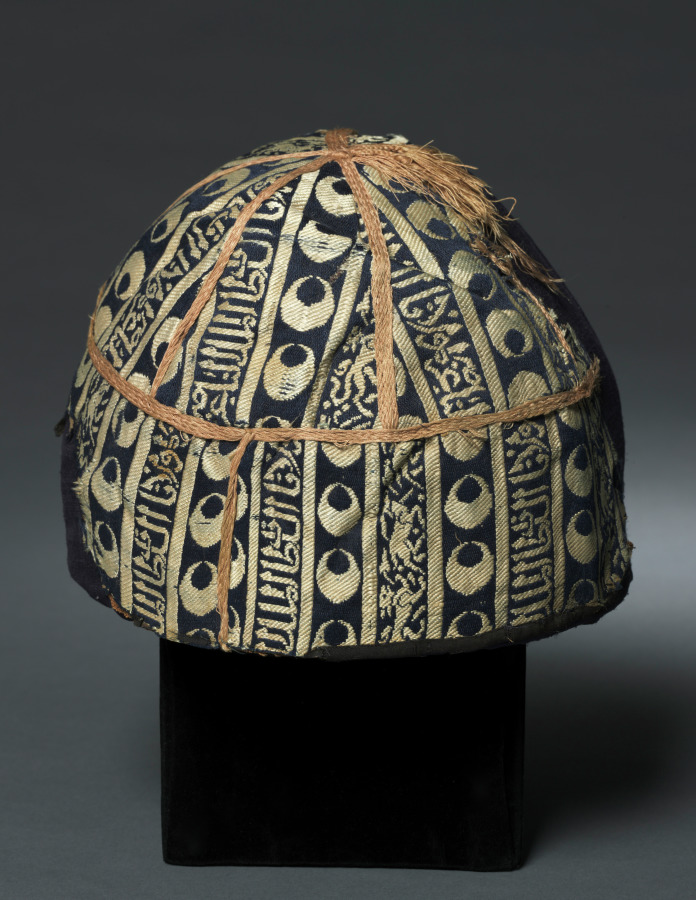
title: Cap with Striped Inscribed Silk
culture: Mamluk Sultanate (Egypt or Syria)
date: 1300s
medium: Silk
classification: Textile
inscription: izz li-mawlana al-sultan al-Malik al-Nasir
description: Headwear was a key part of men’s outfits in medieval Egypt. This luxurious cap was made using a complicated weaving technique, with alternating panels depicting prancing animals, crescent moons, and Arabic script that reads, “Glory to our lord Sultan al-Malik al-Nasir,” the Egyptian ruler. The pale pink trim might have once been a bold shade of red. Such products were created in highly regulated workshops in Cairo and reflect Egypt’s continued flourishing textile industry. Muslim dynasties such as the Mamluks (1250–1517) were known for the lavish garments worn at court and gifted among elites as preferred symbols of honor and praise.